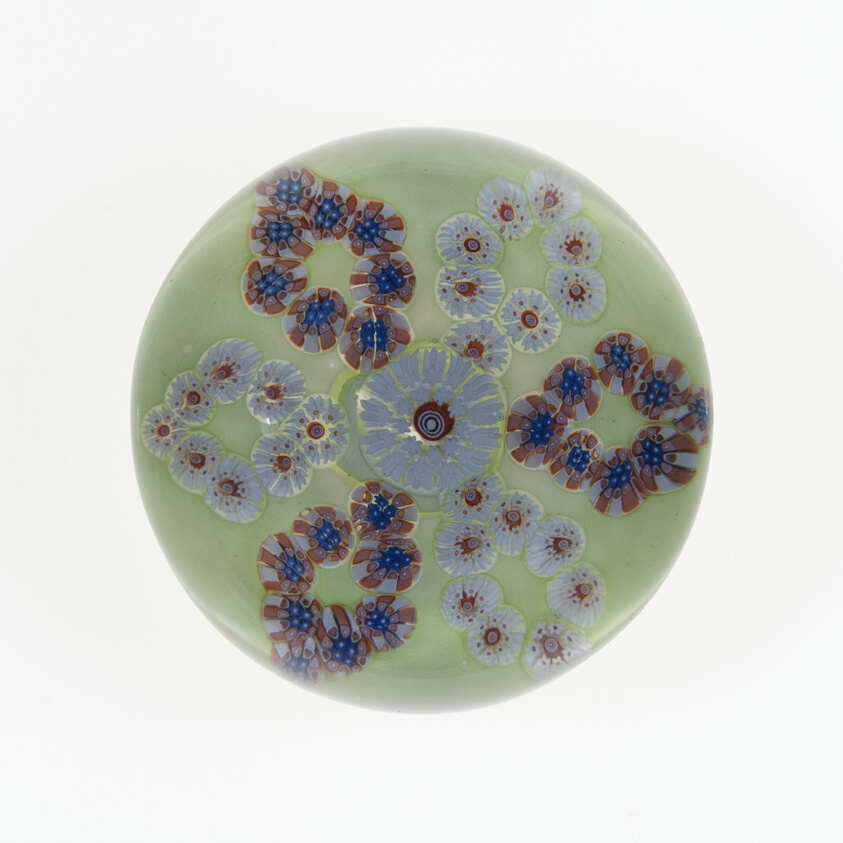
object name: Glass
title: Paperweight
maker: Saint-Louis Glassworks (Cristalleries de Saint-Louis); Lorraine, France, founded 1586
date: c. 1845–60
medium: Glass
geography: Saint-Louis-lès-Bitche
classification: paperweight; glass